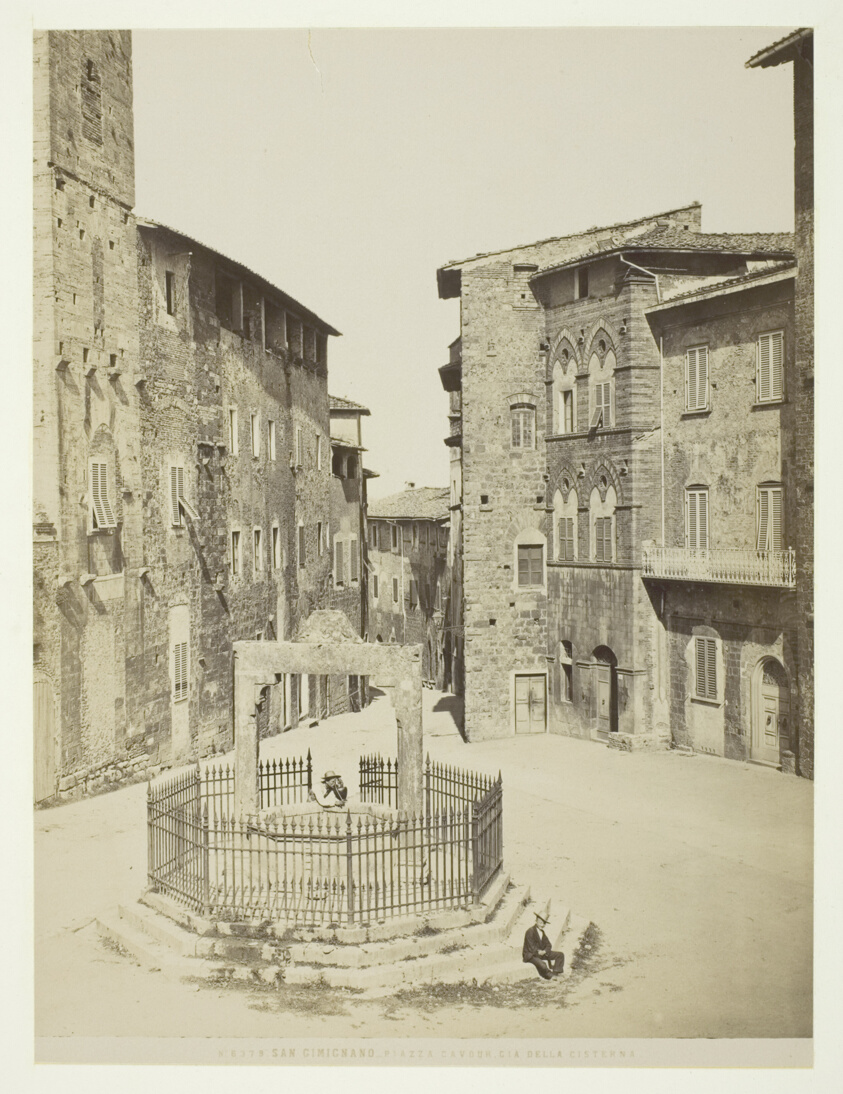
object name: Photograph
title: San Gimignano, Piazza Cavour cis della cisterna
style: 19th century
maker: Artist unknown; Italian, 19th century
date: 1850–1900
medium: Albumen print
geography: Italy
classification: albumen silver print; photographic process; photography; photograph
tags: Collected by Hugh Edwards